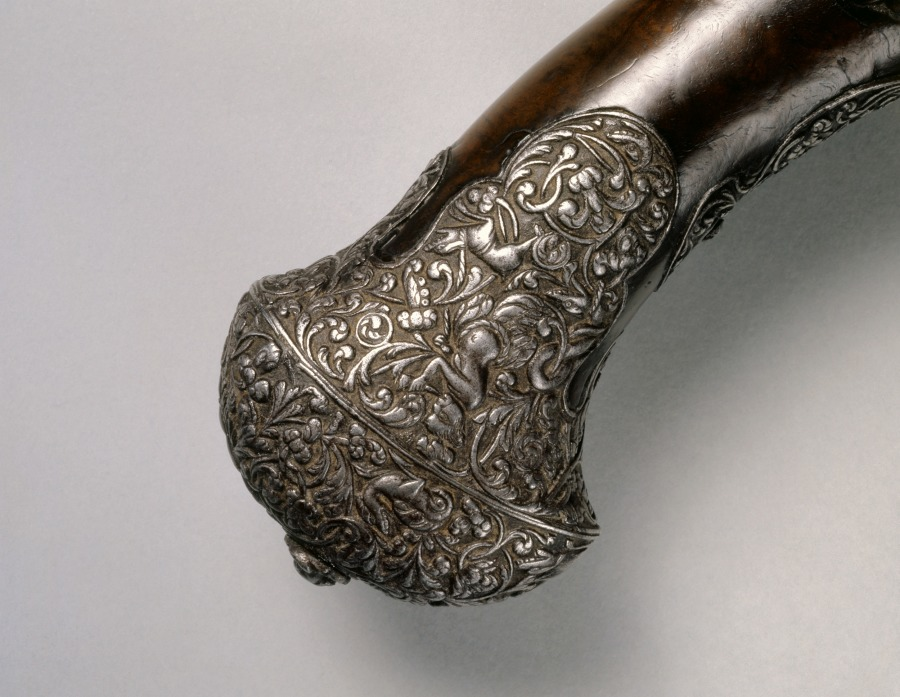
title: Pair of Flintlock Pistols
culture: Italy, Brescia, 17th century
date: c. 1670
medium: steel, chiseled decoration with walnut stock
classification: Arms and Armor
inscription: P. Moretta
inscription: CARLO LERME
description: The chiseling of gun ornament is a task comparable to sculpture on a miniature scale, carried out in an extremely hard material. Since this was usually beyond the skill of most gunsmiths, it was not uncommon for such work to be contracted out as occurred here. While the barrels are signed P. Moretta, the lock plates of these pistols are signed Carlo Lerme, who also chiseled the mounts.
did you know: This type of pistol fired only once before needing to be reloaded, so they were often produced in matched pairs. Even the trigger is decorated on these beautifully ornate weapons. Look closely to compare how a skilled craftsman carefully matched the patterning on these two guns.